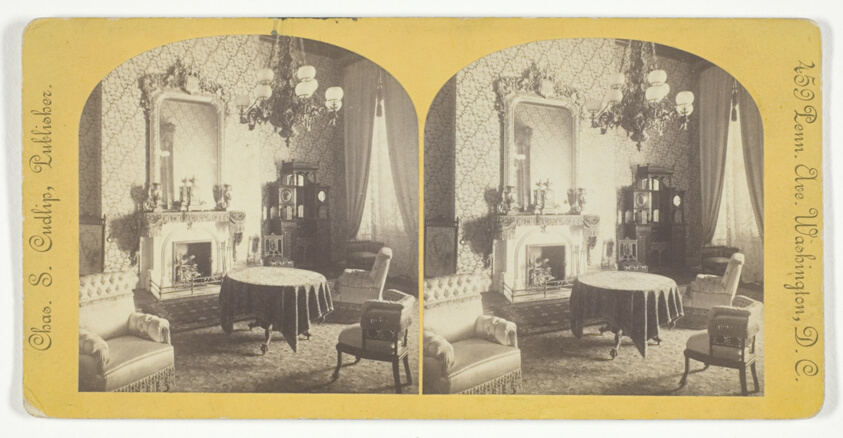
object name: Photograph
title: Green Room, White House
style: 19th century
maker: Chas. S. Cudlip (American, active late 19th century)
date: Late 19th century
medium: Albumen print, stereo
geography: White House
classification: photography; photograph; albumen silver print; stereograph (albumen)